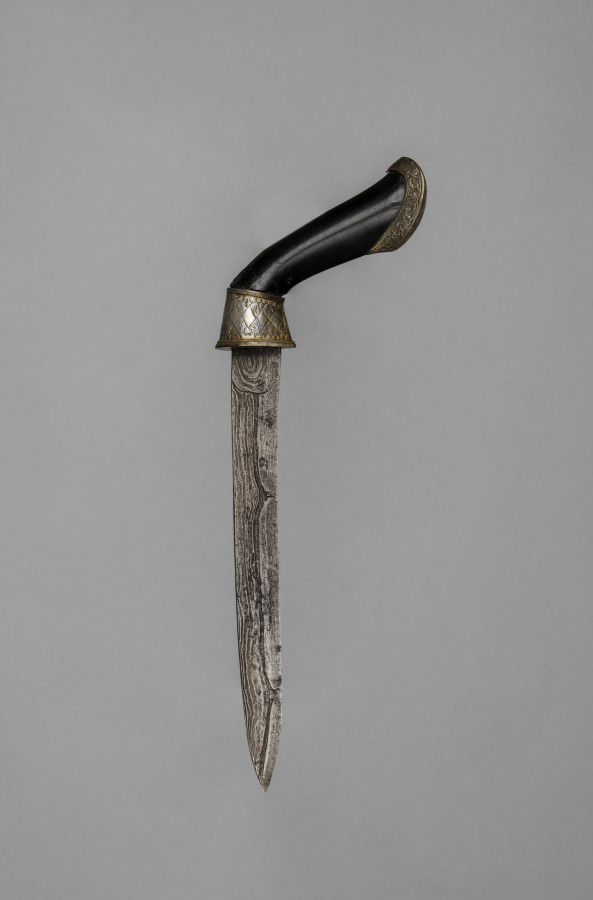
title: Knife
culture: Sri Lanka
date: 1500s–1800s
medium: Blade: damascened steel; handle: wood, bronze, and gilt-silver fittings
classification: Arms and Armor